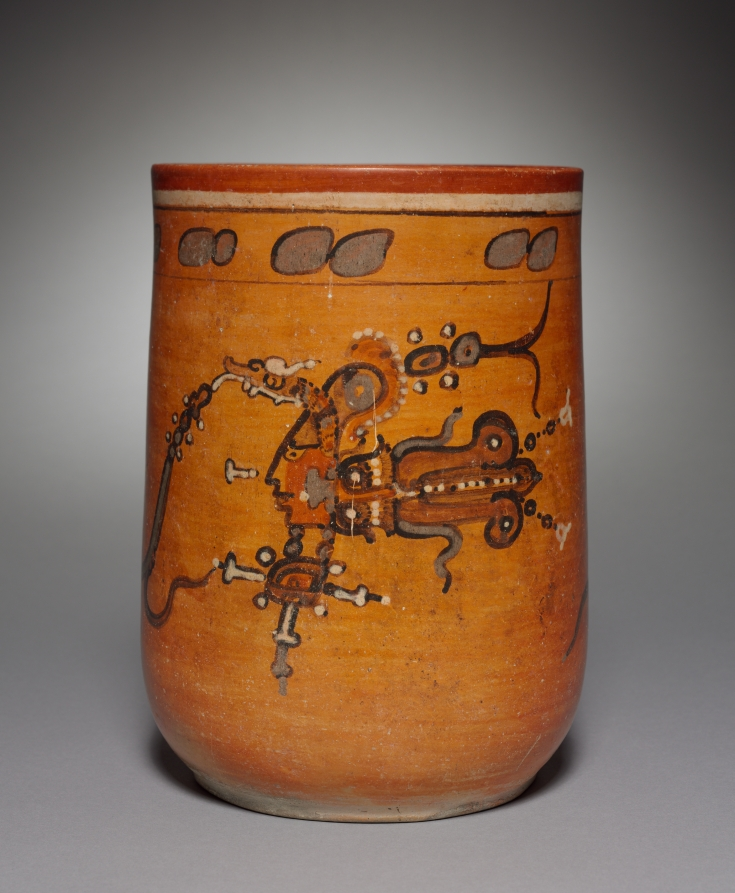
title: Vase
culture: Mexico, Maya, Campeche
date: 250–900 CE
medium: earthenware with colored slips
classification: Ceramic